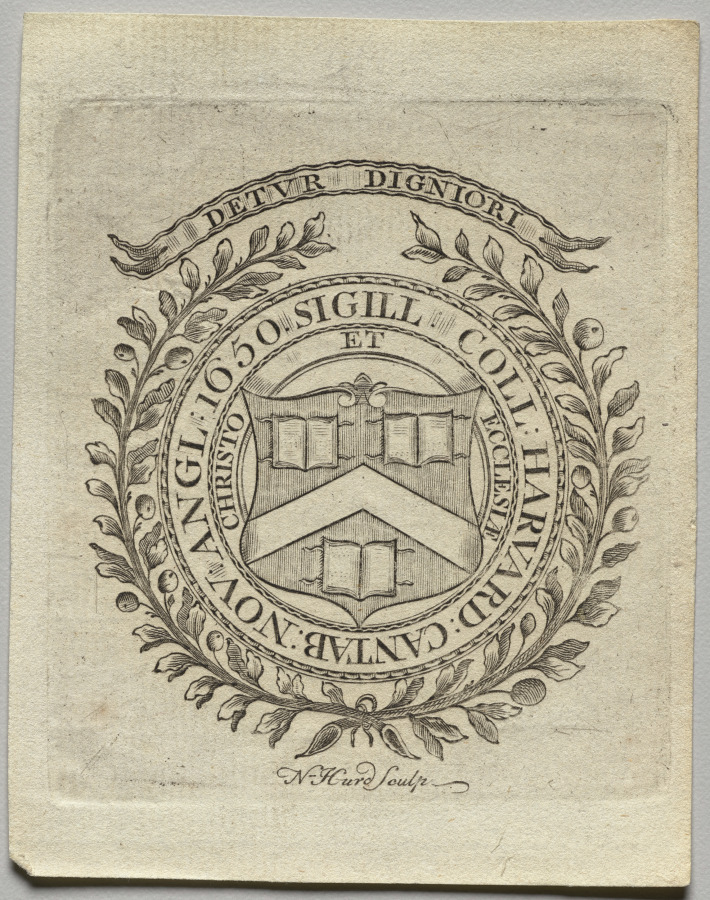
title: Bookplate: Seal of Harvard College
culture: America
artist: Nathaniel Hurd (American, 1730–1778)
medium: engraving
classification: Print